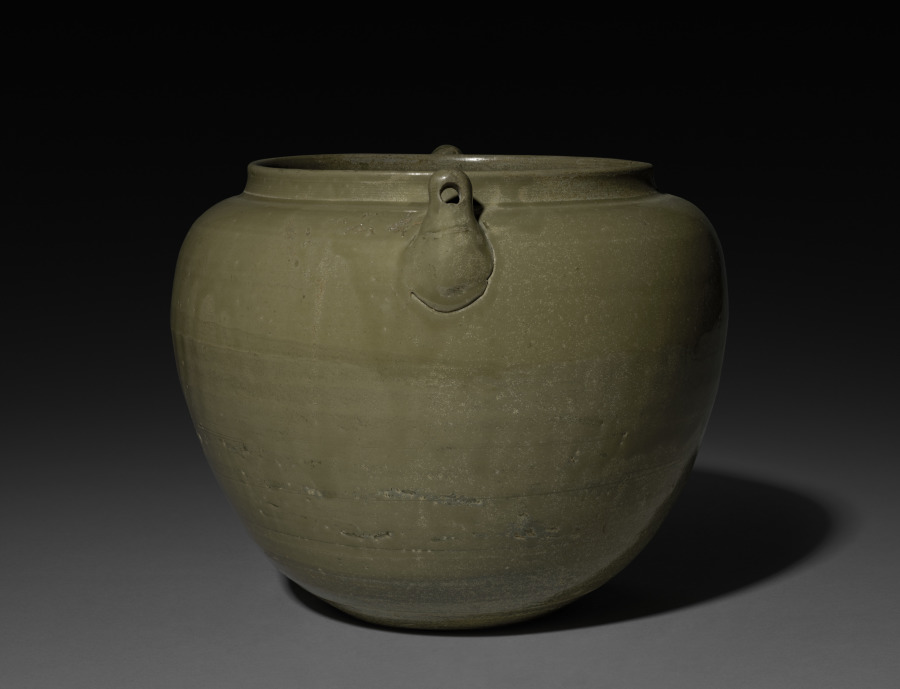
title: Jar with Handles: Yue ware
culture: China, Tang dynasty (618-907)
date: c. 800s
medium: gray stoneware with iron glaze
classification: Ceramic